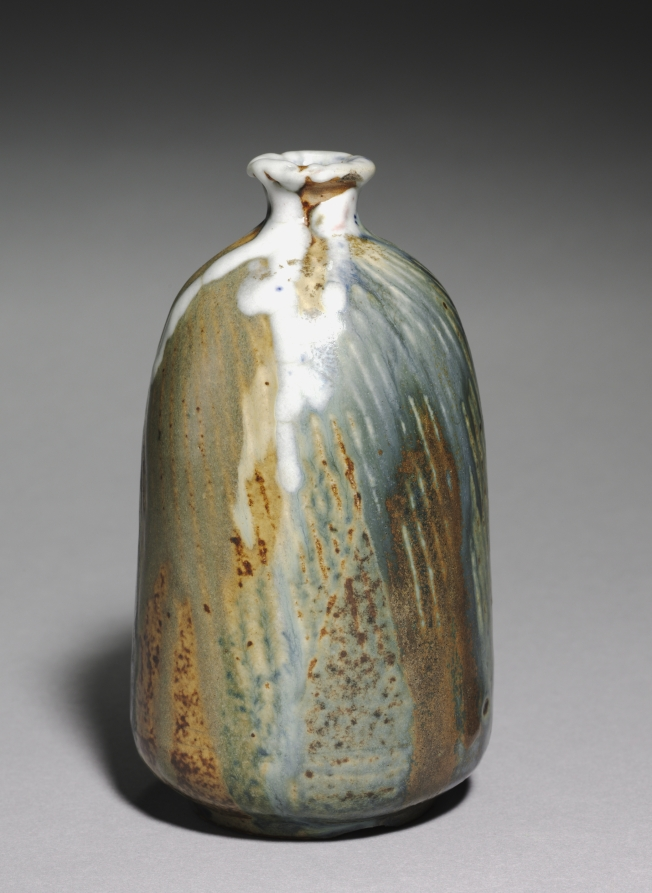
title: Vase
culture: France, 19th century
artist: Jean Carriès (French, 1855–1894)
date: c. 1890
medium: stoneware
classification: Ceramic